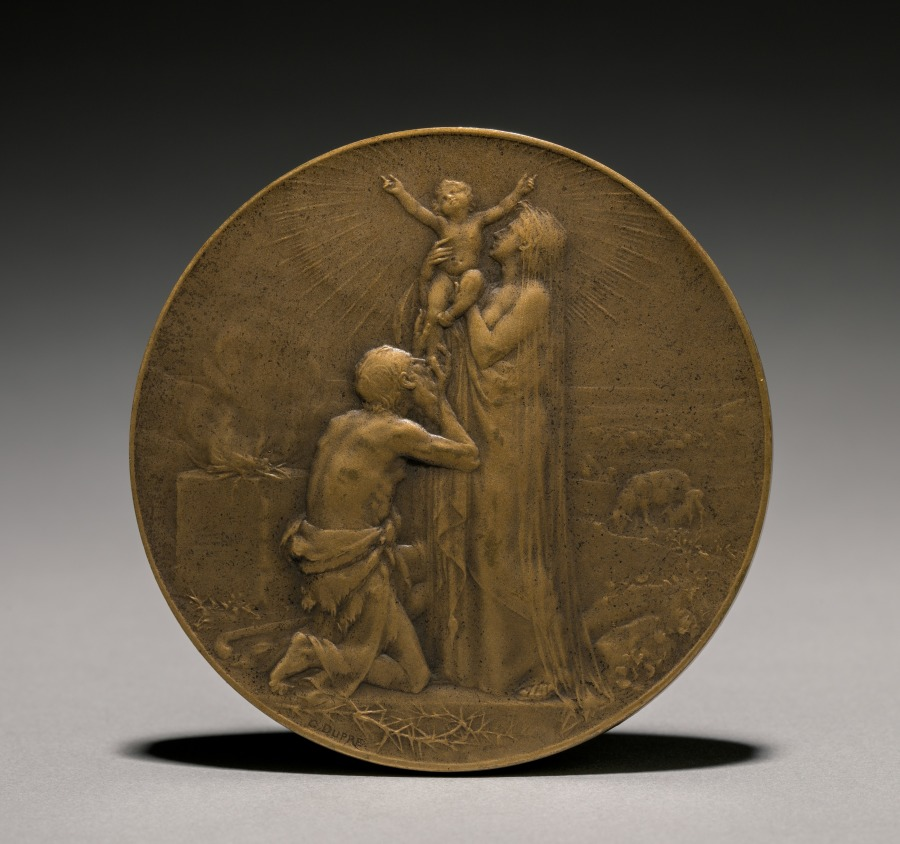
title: Medal (obverse)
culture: France, 19th century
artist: Jules Dupré (French, 1811–1889)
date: 1800s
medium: bronze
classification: Metalwork